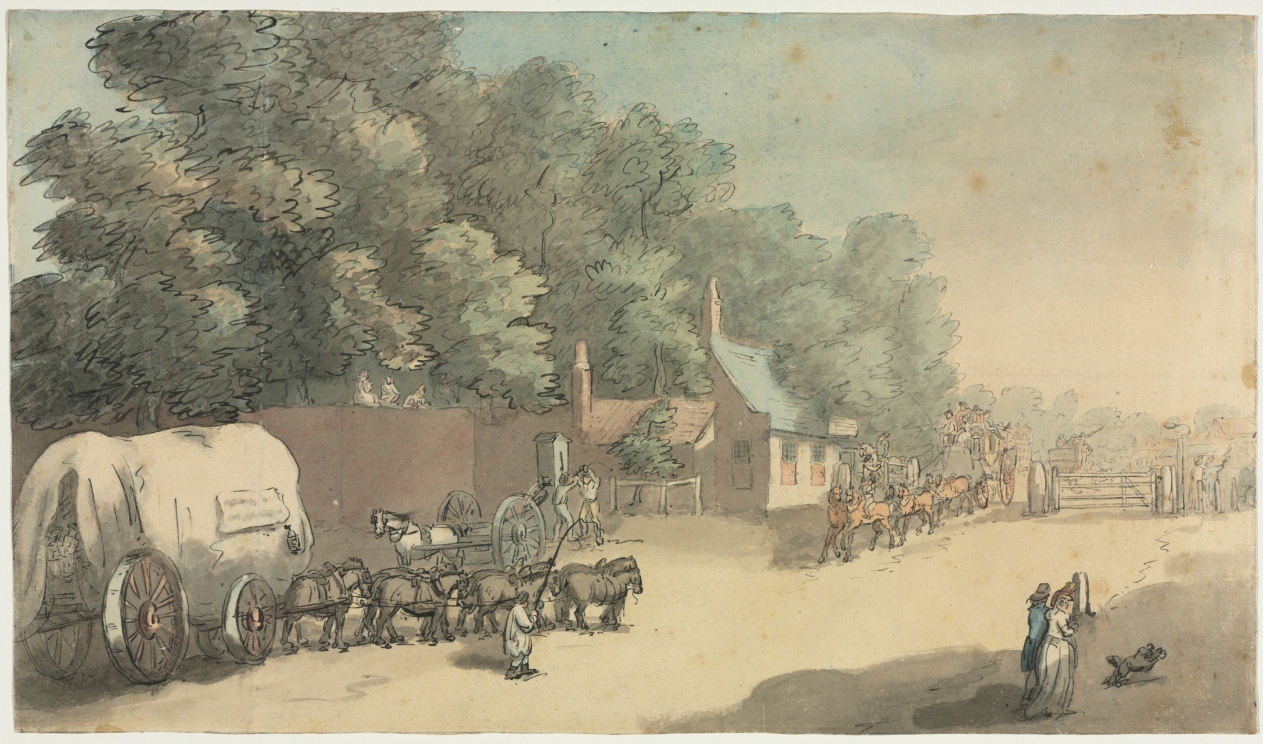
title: The Turnpike Gate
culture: England, 18th century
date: 1700s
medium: pen and ink and watercolor wash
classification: Drawing